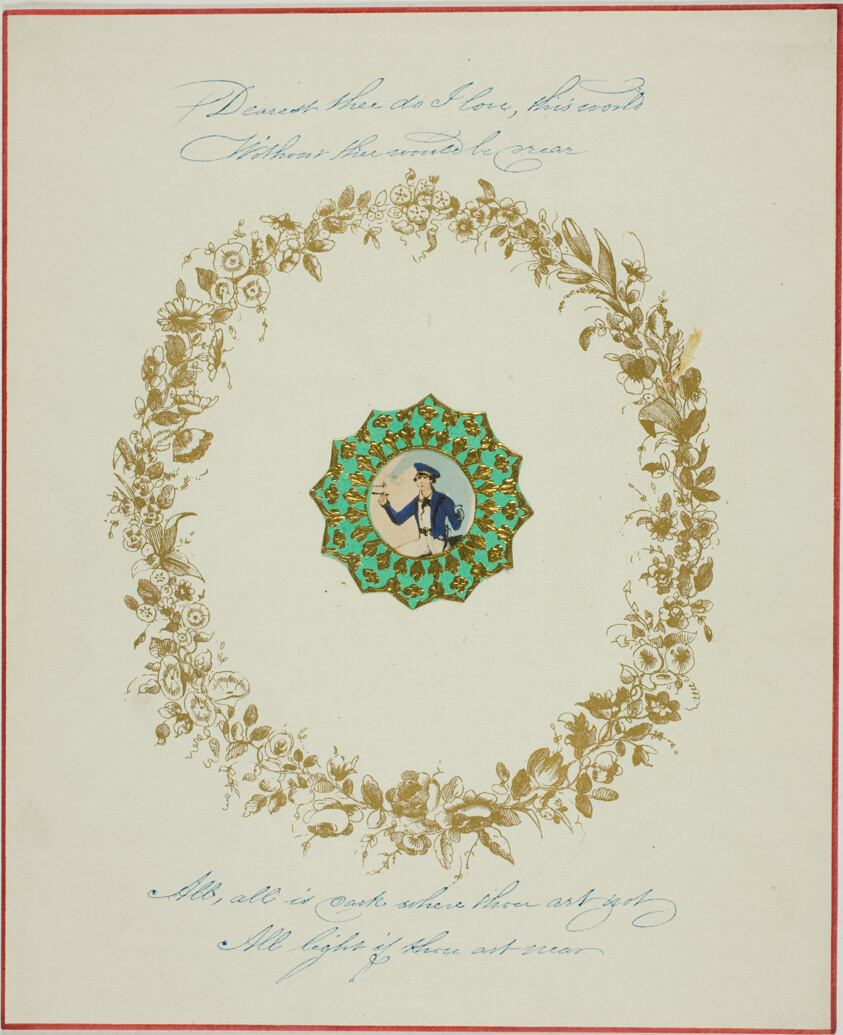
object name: Drawing and Watercolor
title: Dearest Thee I Do Love (valentine)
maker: Unknown Artist; English, 19th century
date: c. 1850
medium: Collaged element and pen and blue ink on color lithograph on ivory laid paper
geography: England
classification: valentine; prints and drawing; paper